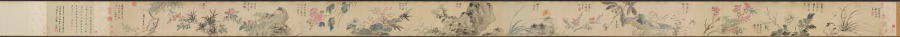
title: Flowers of Four Seasons, with Poems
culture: China, Ming dynasty (1368–1644)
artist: Wang Guxiang (Chinese, 1501–1568)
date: 1531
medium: handscroll; ink and light color on silk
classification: Painting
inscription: Artist's inscription, signature, and 15 seals. Ink Orchids. Sewn as pendants for the man of worth, swaying quiety, fragrance in the valley. [seal] Hsiao-chu ts'un Peony. Wiping his face, the young gentleman Ho [Ho Yen of Wei, Three Kingdoms] appears to have been powdered. His previous life was the perfume-stealing Han Shou [of Chin, 265–419 CE], the fragrance still lingers. [seal] Ts'un-wu chai. Flowering Crab Apple, New Bamboo. Shao-lin [Du Fu, 712–770] had to put down his brush. [Flowering Crab Apple]. Yü-k'o [Wen T'ung, d. 1079) in vain wrote poems about [Bamboo]. [seal] Yu-shih. Lotus Flowers. When she turns her head, half-hidden by a fan, and casts a glance, all the beautiful women become colorless. [seal] K'ang yüeh huai. Loquat. Ripeness in summer. [seal] Lu-chih. Pomegranate Flower. Whenever I remember you I will send my thoughts, but where have you gone--the [skirt] of pomegranate red? [seal] Wu-ho Sheng. Day Lily. Plant the day lily to forget sorrow. [seal] Yu-shih. Chrysanthemum. The untrammelled joy at the eastern fence. [seal] Lu-chih. Begonia. Comparing it to the beauties of Spring, and spreading them out as trimming for the stone steps. [seal] Yu-shih. Hibiscus. In recent years I have always enjoyed looking at flowers; instead of dark red I preferred pink ones. [seal] Jen-sheng i-lou. Narcissus, Camellia. The jade girdle left behind at Lo River. [Narcissus]. The precious pearls glitter before Spring. [Camellia]. [seal] Lu-chih. Heavenly Bamboo (Nandina domestica). A single branch in the wintry season. [seal] K'ang yüeh huai. Plum. Fragrant snow in the Lo-fou Mountains. [seal] Ts'un-wu chai. In the eleventh lunar month of the hsin-mao year of the Jiaqing era [1531], [I] imitated the boneless style of Yüan masters in sketching from life. Guxiang [seals] Yu-shih; Lu-chih. Translated by Wai-kam Ho/Lingyun Shih Liu (1980)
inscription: 2 colophons and 23 additional seals: 1 colophon dated 1632, and 2 seals of Li Jih-hua [Li Rihua] 李日華 (1565–1635); 1 colophon and 2 seals of Xiang Shengmo 項聖謨 (1597–1658); 3 seals of Liang Qingbiao 梁清標 (1620–1691); 6 seals of the Jiaqing 嘉慶 emperor (r. 1796–1820); 9 seals of Ch'eng Ch'i [Cheng Qi] 程琦 (1911–1988)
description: In this painting, flowers are loosely arranged by the seasons: narcissus and peony represent early spring; yellow loquat and lotus, summer; chrysanthemum, autumn; and the plum and evergreen bamboo, winter. The artist added to each flower a poetic line of calligraphy associating each plant with a historic or legendary figure. For example, the chrysanthemum, along with the line “The untrammeled joy at the eastern fence,” refers to the poet Tao Yuanming (died AD 427) who enjoyed chrysanthemums at the eastern fence in his garden. The scroll illustrates Wang Guxiang’s mastery of free brushwork, combining light monochrome ink with transparent colors. In his inscription, Wang says he used the “boneless” style without outlines as developed during the Yuan dynasty (1279–1368). Wang was a native of Changzhou, a city in southeast China known for its rich flora and fauna, and flower-and-bird painting tradition.